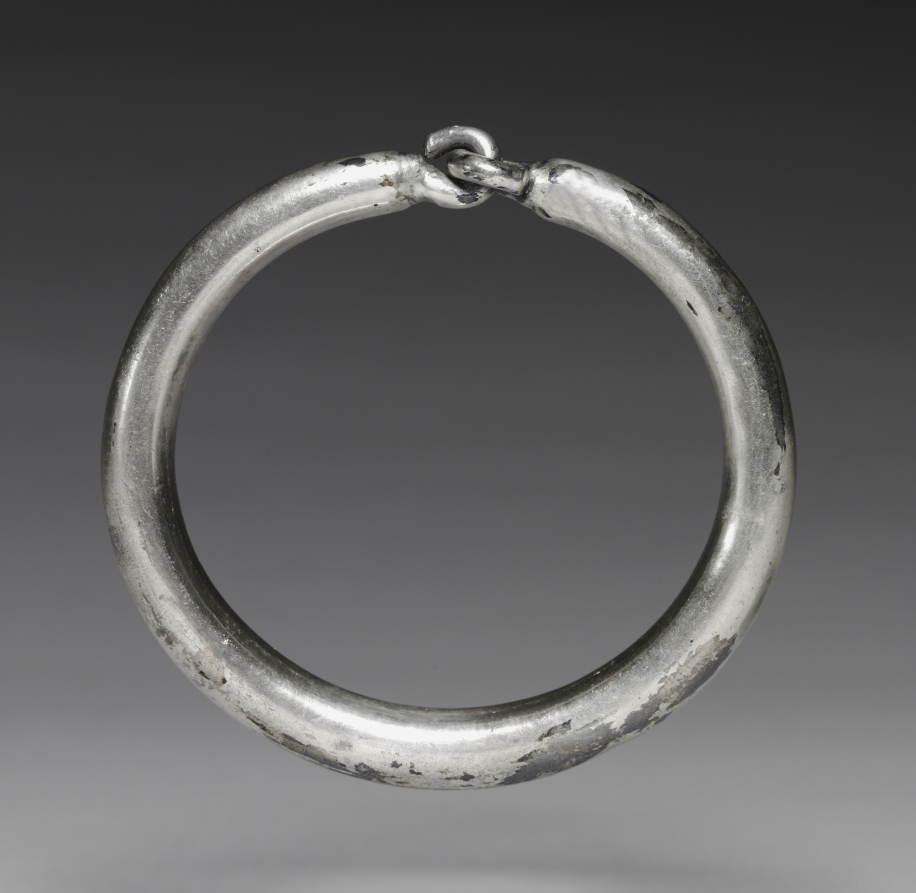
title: Bracelet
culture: Greece, late Hellenistic period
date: 200–1 BCE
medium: silver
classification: Jewelry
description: This bracelet is part of a set of jewelry including a bracelet and a necklace of similar design (1986.181). Torques in antiquity were often paired with matching bracelets, though our set only has one. While in the Thracian and Scythian cultures these torque sets represented elite status, in Greek culture they came to represent non-Greek “barbarians” and were used as stereotypical symbols of non-Greeks.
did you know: This silver bracelet is made from a single piece of metal.